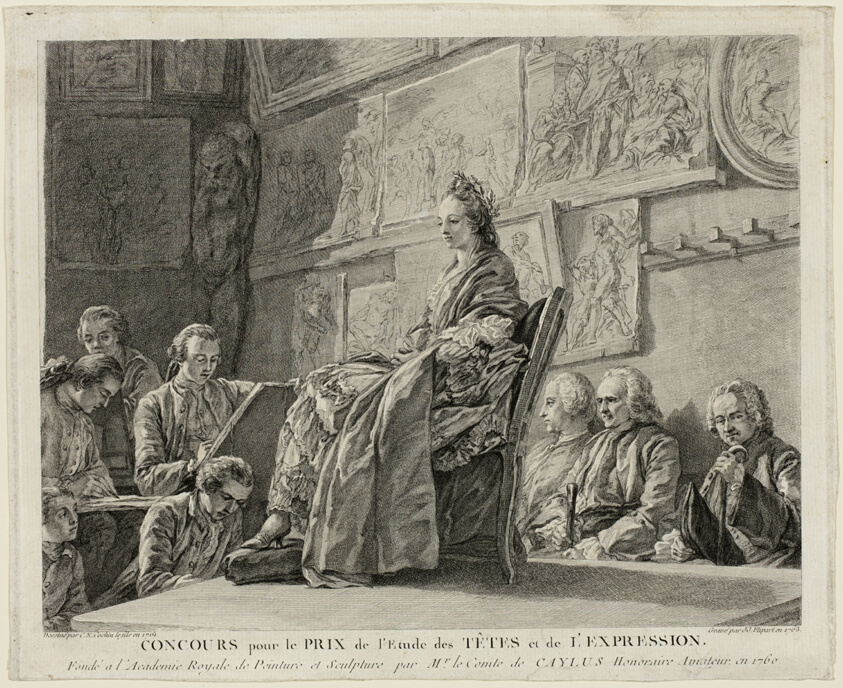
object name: Print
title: Contest for the Prize for the Study of Heads and Expression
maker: Jean-Jacques Flipart (French, 1719-1782); after Charles-Nicholas Cochin (French, 1715-1790)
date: 1763, based on a drawing from 1761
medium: Etching and engraving on off-white laid paper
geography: France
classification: etching; paper; print; prints and drawing